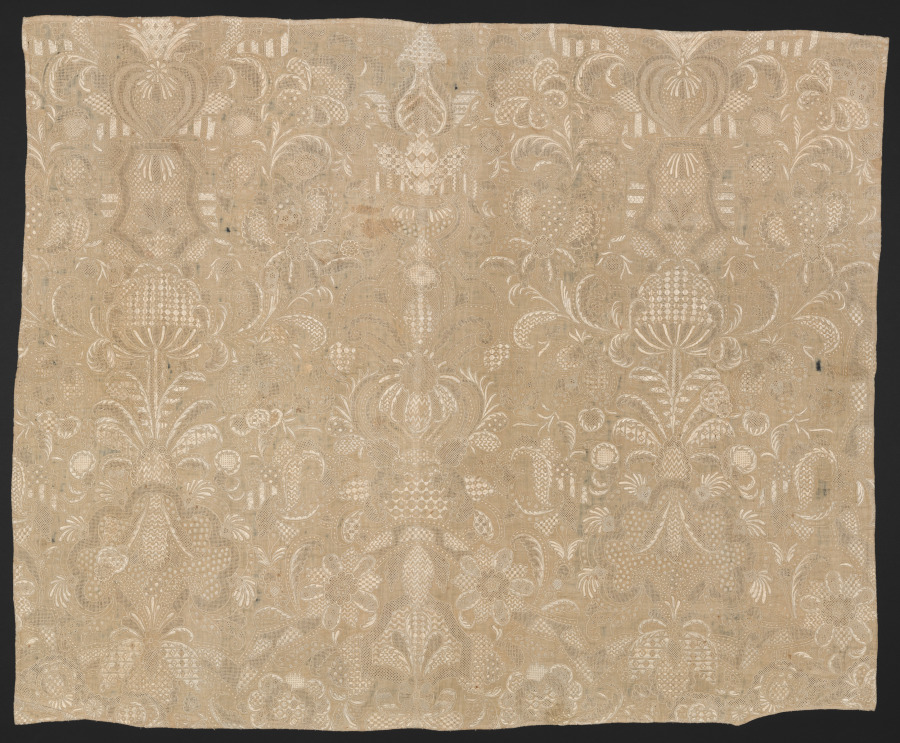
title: Fragment of Embroidered Cloth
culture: England or Ireland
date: 1700s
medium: Twill weave cotton: embroidered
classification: Embroidery